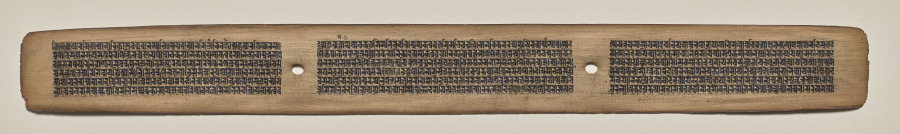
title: Text, Folio 82 (recto), from a Manuscript of the Perfection of Wisdom in Eight Thousand Lines (Ashtasahasrika Prajnaparamita-sutra)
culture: Eastern India, Bihar, Vikramashila Monastery. Painting: Nepal, Kathmandu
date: Sunday, September 14, 1119 (year 239 of the Newar Samvat in the month of Ashvina)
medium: gum tempera and ink on palm leaves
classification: Painting